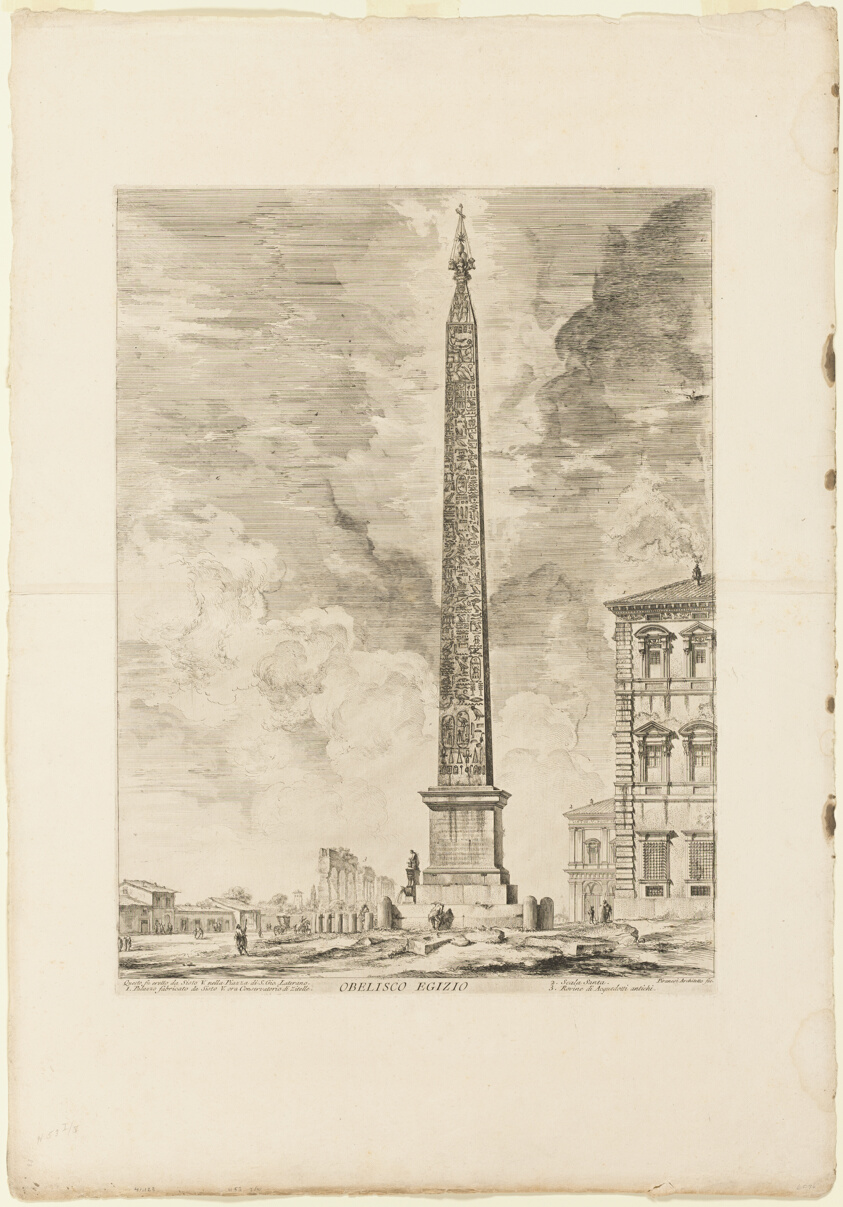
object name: Print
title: Egyptian Obelisk. This was erected by Pope Sixtus V in the Piazza of St. John Lateran, from Views of Rome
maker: Giovanni Battista Piranesi (Italian, 1720-1778)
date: 1750/59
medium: Etching on heavy ivory laid paper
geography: Italy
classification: etching; print; prints and drawing